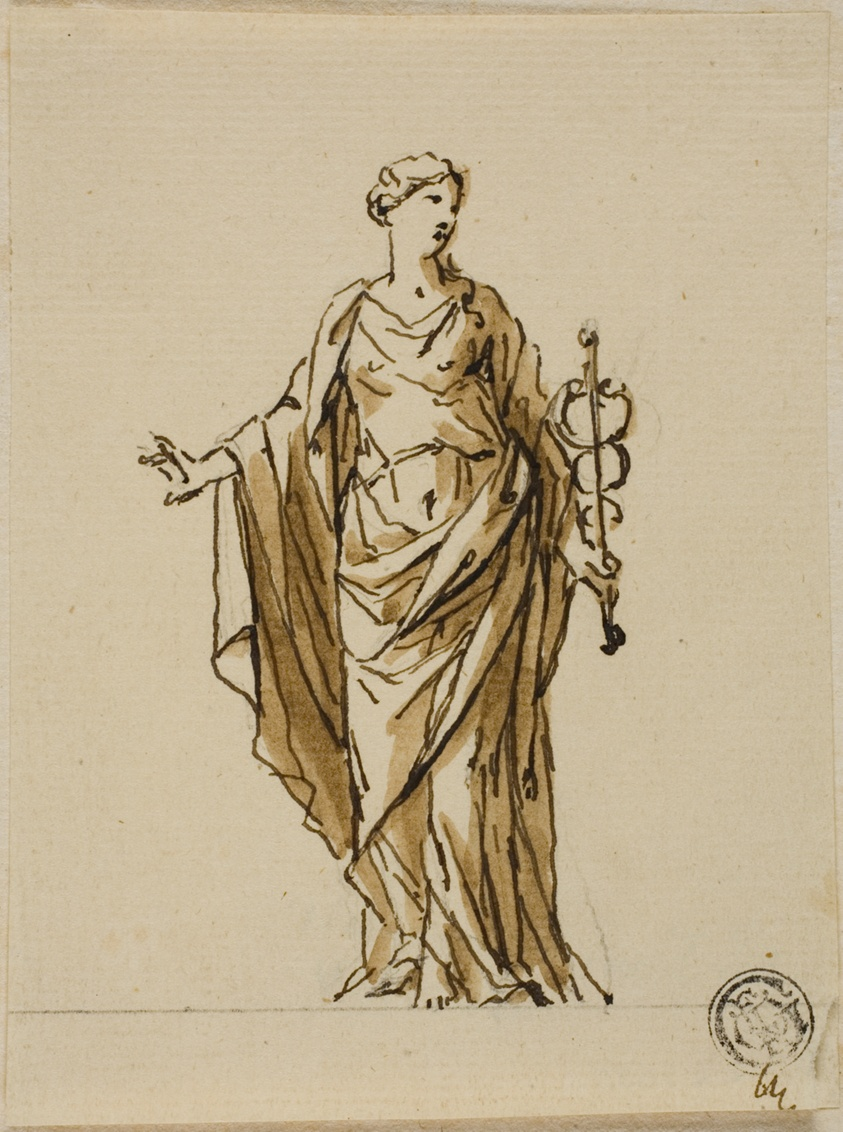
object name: Drawing and Watercolor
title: Standing Allegorical Figure with Caduceus (Peace?)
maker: John Michael Rysbrack (Flemish, 1693-1770)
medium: Pen and brown ink, with brush and brown wash, over graphite, on cream laid paper, tipped onto ivory laid paper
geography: Flanders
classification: pen and ink drawings; drawings (visual works); prints and drawing